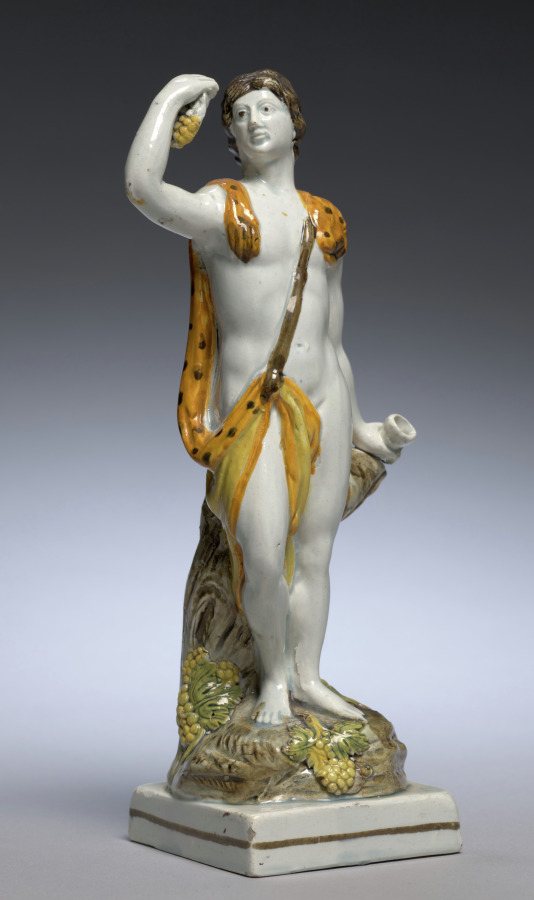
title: Bacchus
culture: England, Staffordshire, Pratt ware, late 18th-early 19th Century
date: c. 1800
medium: earthenware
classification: Ceramic